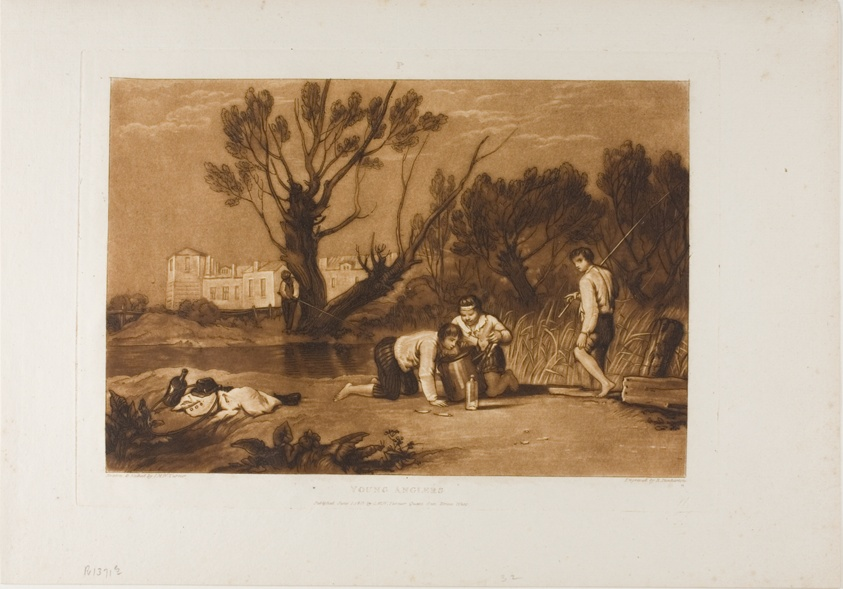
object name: Print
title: Young Anglers, plate 32 from Liber Studiorum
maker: Joseph Mallord William Turner (English, 1775-1851); Engraved by R. Dunkarton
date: published June 1, 1811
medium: Etching and engraving in brown on ivory wove paper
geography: England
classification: etching; print; prints and drawing